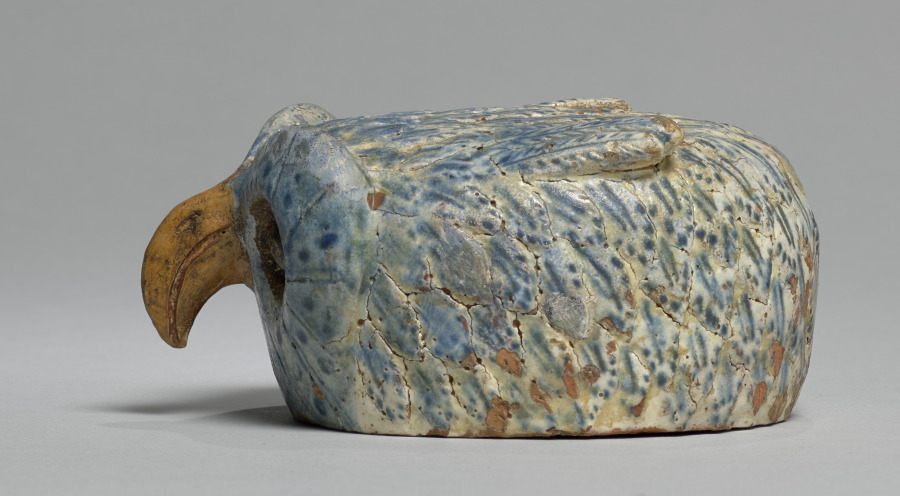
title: Owl (head)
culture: Southern Germany, 16th century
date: 1540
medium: faience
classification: Ceramic